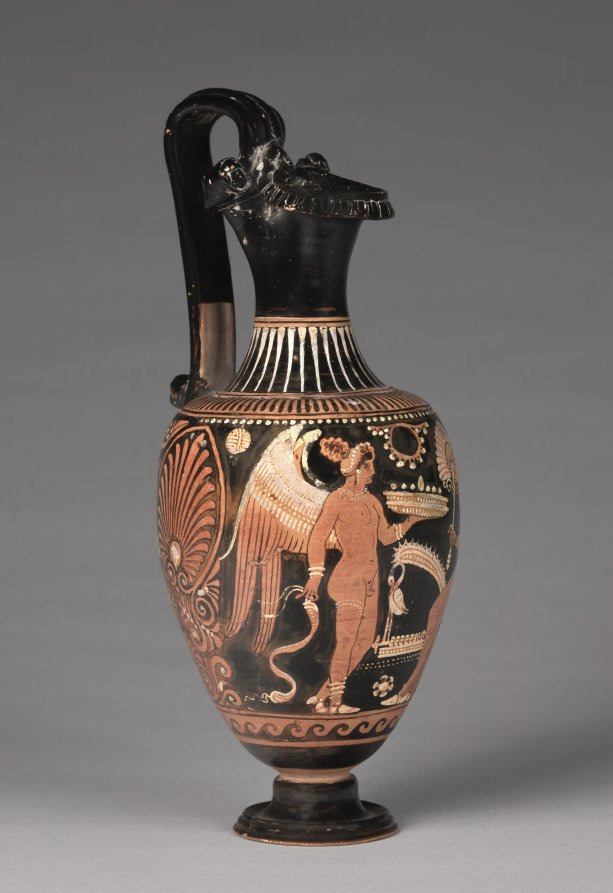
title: Red-Figure Oinochoe (Wine Jug): Eros and Woman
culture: South Italian, Apulian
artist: attributed to Cleveland Group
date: c. 340–320 BCE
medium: ceramic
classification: Ceramic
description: This wine jug provides the name for the Cleveland Group, comprising more than 20 similar vases decorated in the "Ornate" style of Apulian red-figure pottery. Close in style to the better known Darius Painter and the Patera and Ganymede Painters, many Cleveland Group vases feature very effeminate Eros figures like this one, here holding two phialai (libation bowls) and facing a woman before a harp.